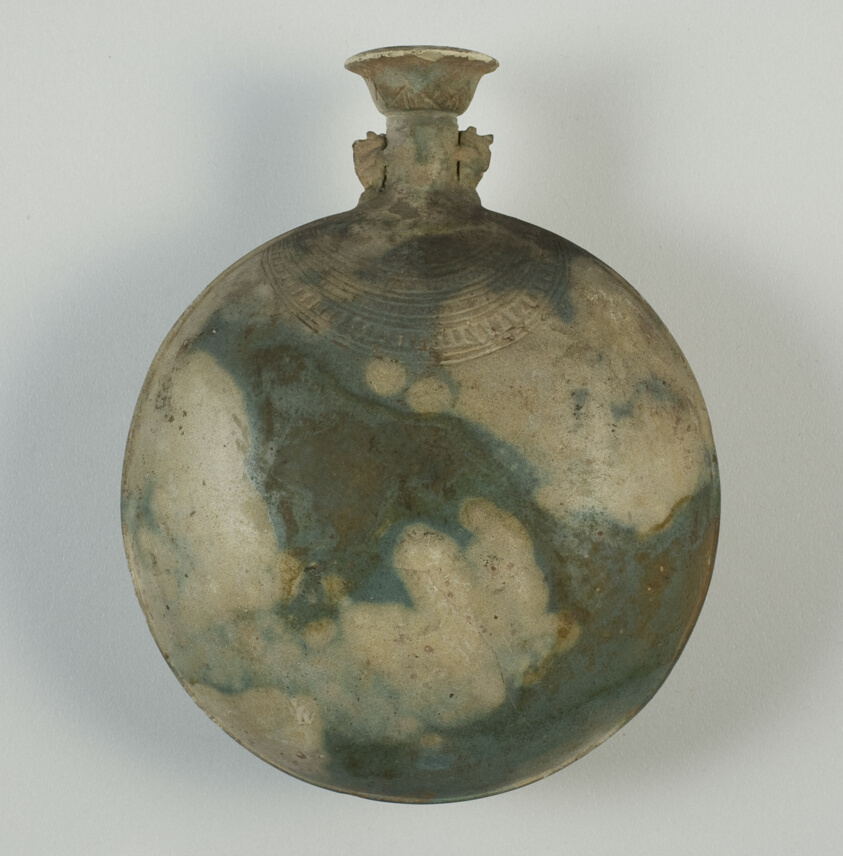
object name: Vessel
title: New Year's Flask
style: late period (egyptian), egyptian, ancient, twenty-sixth dynasty, saite period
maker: Egyptian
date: Late Period, Dynasty 26 (664–525 BCE)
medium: Faience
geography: Egypt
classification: flask (bottle); bottle; ceramics; vessel; ancient art; faïence (composite material)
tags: baboon, Hieroglyphs